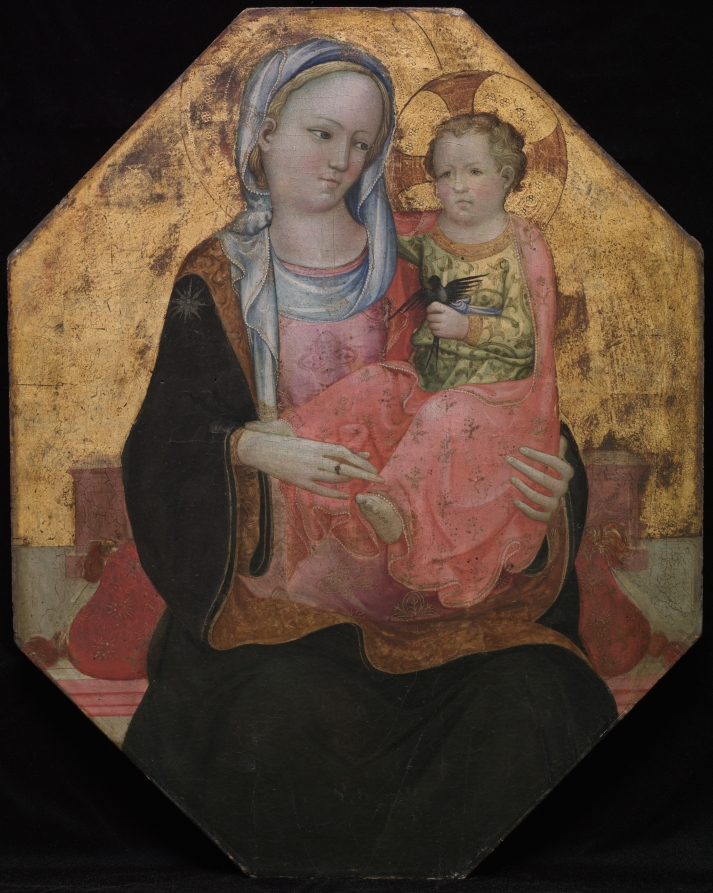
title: Virgin and Child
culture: Italy, Florence, 15th century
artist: Rossello di Jacopo Franchi (Italian, c.1376–1457)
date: late 1430s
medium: tempera on wood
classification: Painting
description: In his left hand the Christ Child holds a swallow. Swallows were thought to hibernate during winter in nests of mud. Their re-emergence in spring symbolized the Resurrection of Christ. This painting was probably the central panel of an altarpiece. After the altarpiece was broken up, the work was cut into its present octagonal shape.